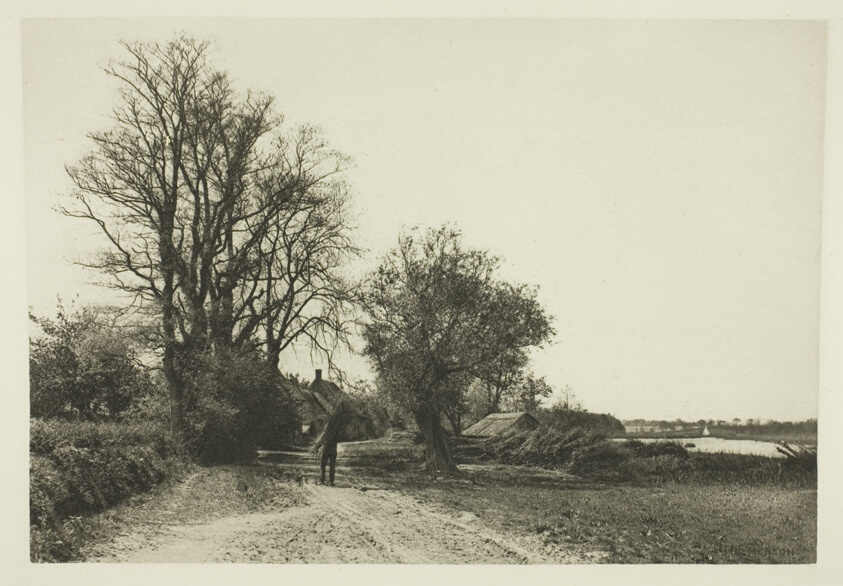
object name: Photograph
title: The Farm by the Broad (Norfolk)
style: 19th century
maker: Peter Henry Emerson (English, born Cuba, 1856–1936)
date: c. 1883/87, printed 1888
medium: Photogravure, pl. IX from the album "Pictures of East Anglian Life" (1888)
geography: England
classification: photogravure; photomechanical process; photography; photograph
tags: Collected by Hugh Edwards, Pictures of East Anglian Life, Seat of War in the Crimea